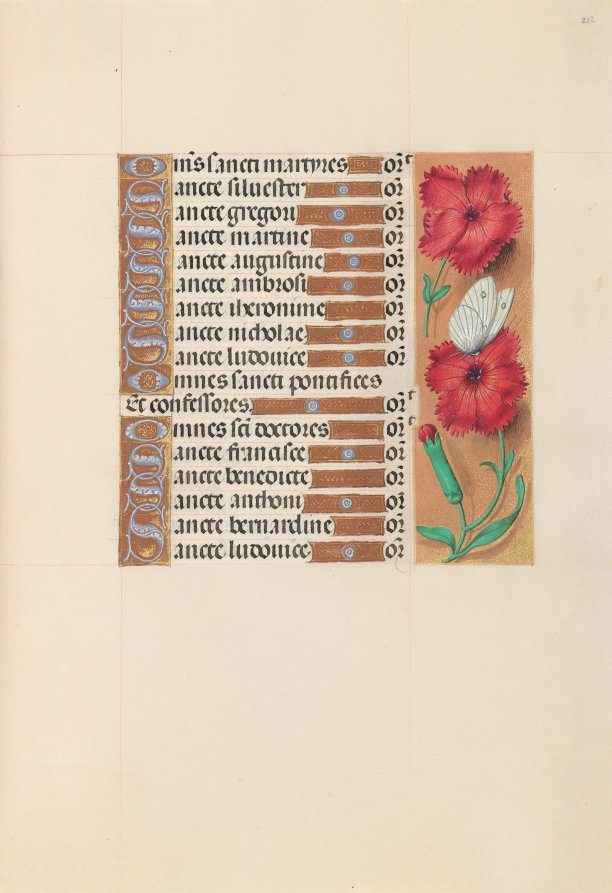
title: Hours of Queen Isabella the Catholic, Queen of Spain: Fol. 212r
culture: Flanders, Ghent and Bruges, late 15th century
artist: Master of the First Prayerbook of Maximillian (Flemish, c. 1444–1519)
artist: and Associates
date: c. 1500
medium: ink, tempera, and gold on vellum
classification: Bound Volume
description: This manuscript was illuminated by a circle of at least five highly organized manuscript painters active in the Flemish cities of Ghent and Bruges. The principal illuminator was Alexander Bening, who painted the majority of the book's miniatures. Manuscripts produced by this circle of artists are renowned for the decoration of their borders, which typically feature a rich variety of realistically-painted flowers, birds, and butterflies. This prayer book, called a book of hours, was intended not for a cleric, but for the private devotions of a lay person-in this case, Isabella the Catholic, Queen of Spain (1451-1504). Isabella's coat of arms embellishes the book's frontispiece. It is unlikely that the book was commissioned by the Queen herself; rather, she probably received it as a diplomatic gift from someone courting her patronage, perhaps Cardinal Francisco Jimenez de Cisneros. A Franciscan friar, Jimenez was dependent upon Isabella for his advancement, first to the post of Queen's confessor in 1492, and then to Archbishop of Toledo in 1495.